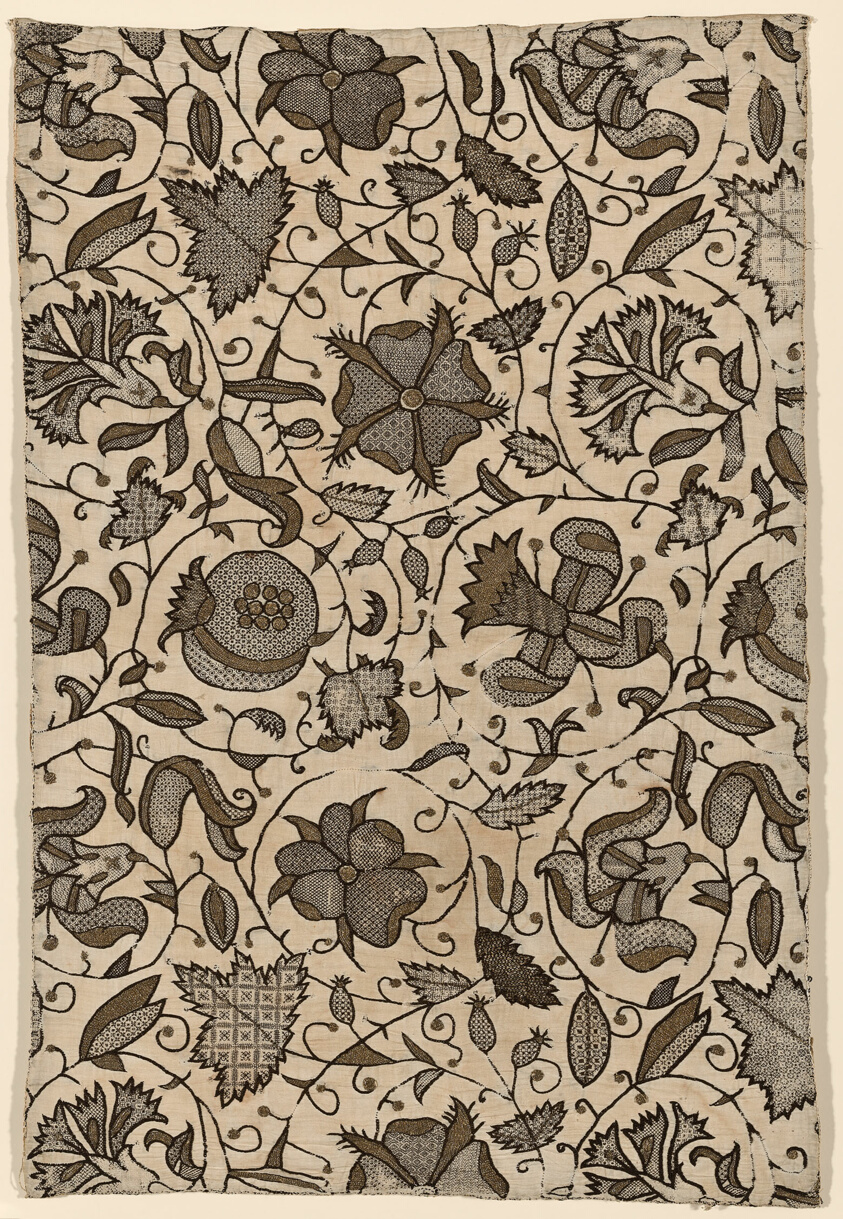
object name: Textile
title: Cushion Cover (Made from Woman's Dress)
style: elizabethan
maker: England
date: Elizabethan period, 1575/1600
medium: Linen, plain weave; embroidered with silk yarns and gilt-metal-strip-wrapped silk in Algerian eye, back, ceylon, chain, detached buttonhole, double running, plaited braid, running, square openwork and stem stitches; couching; woven wheels; lined with linen, plain weave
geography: England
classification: textile; needlework (visual works)